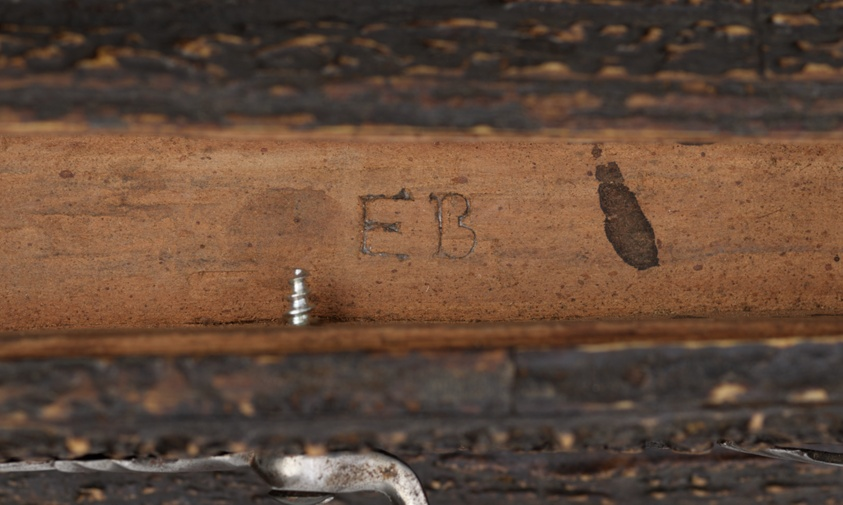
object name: Arms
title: Wheellock Rifle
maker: Elias Becker (German, Augsburg active 1633-1673); Augsburg, Germany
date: c. 1670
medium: Steel, staghorn, cherry wood, beech wood, gilt brass, copper, and enamel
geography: Augsburg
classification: firearm-long gun; arms; decorative arts; european decorative arts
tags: arms